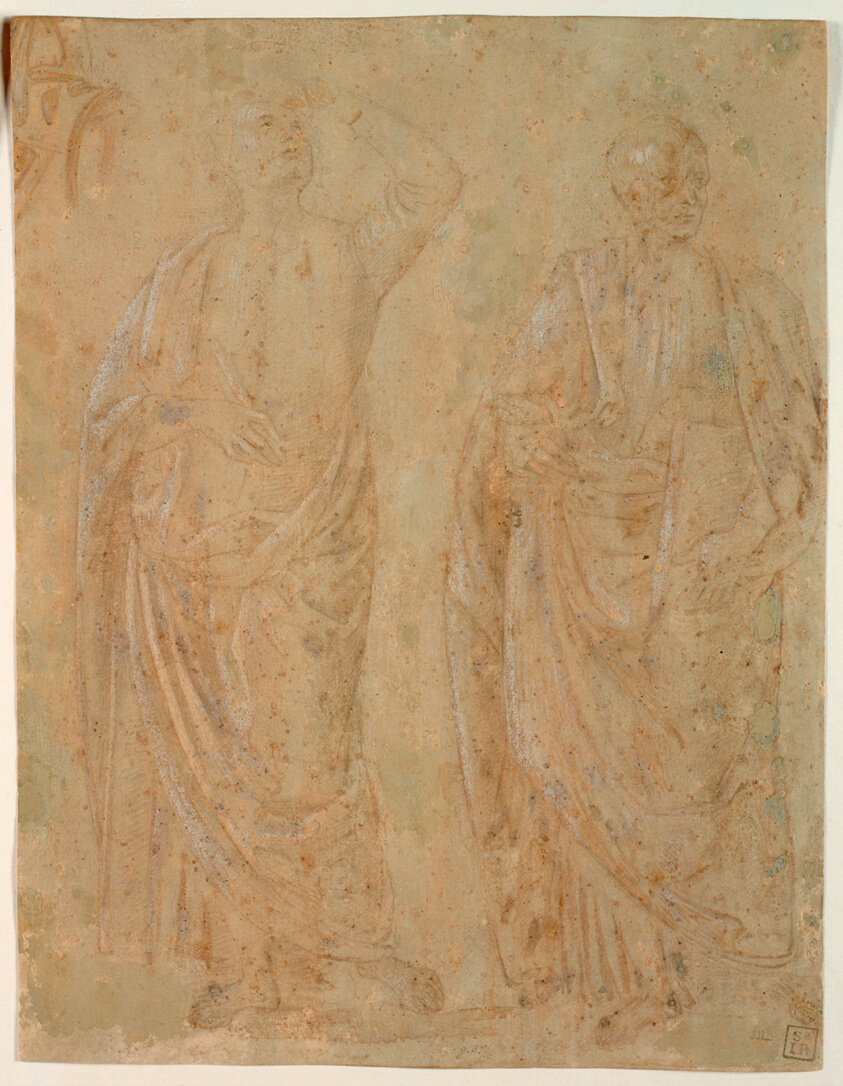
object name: Drawing and Watercolor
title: Two Standing Draped Male Figures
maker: Pietro di Cristoforo Vannucci, called Perugino, after; Italian, c. 1445-1523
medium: Pen and brush and brown ink, with lead white, on tan laid paper with light green wash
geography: Italy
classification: pen and ink drawings; drawings (visual works); prints and drawing